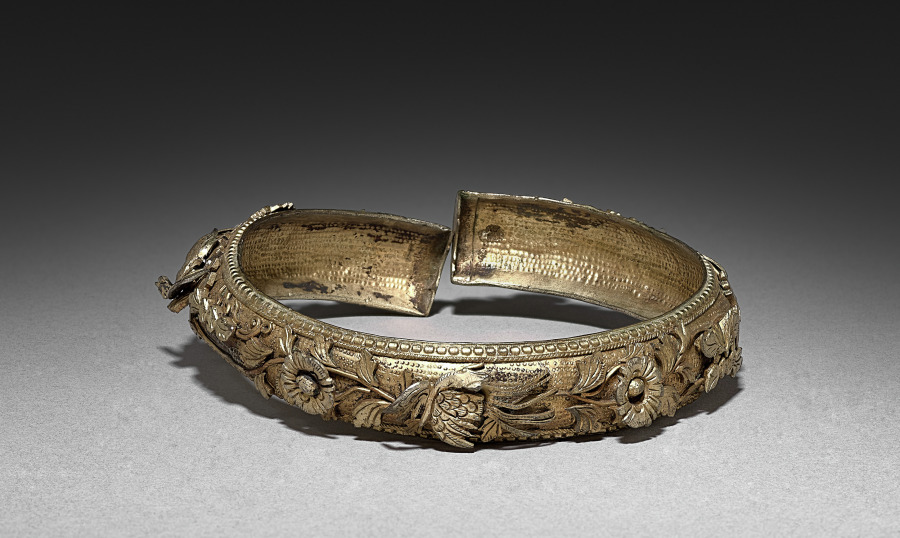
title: Armlet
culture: Burma (?)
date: 1800s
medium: silver gilt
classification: Jewelry